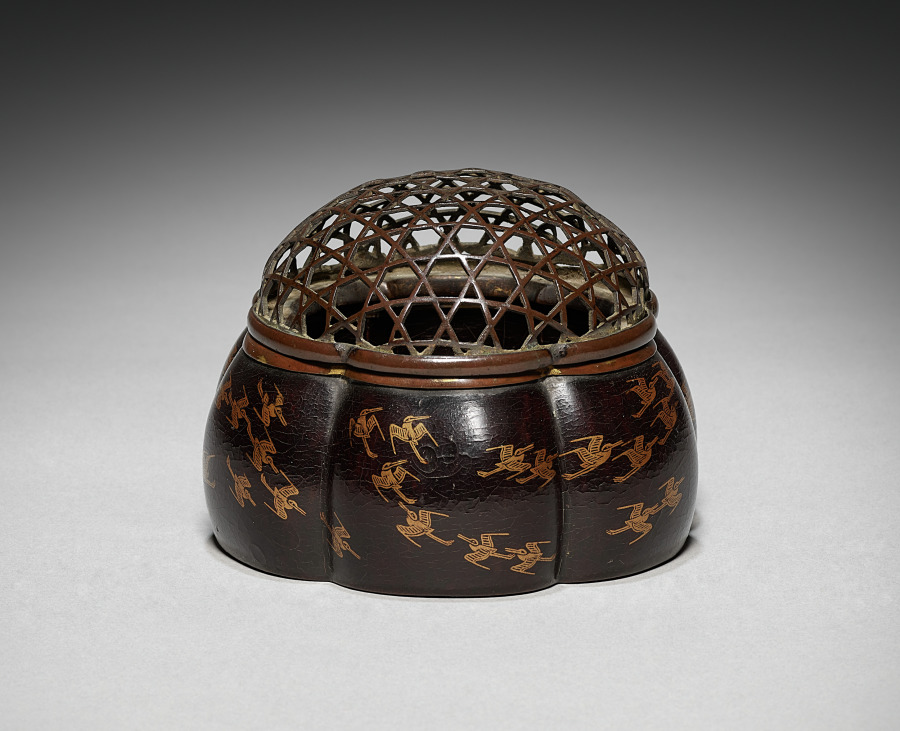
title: Incense Burner with Lid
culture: Japan, Nanbokuchō period (1336–92)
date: late 1300s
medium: black lacquer on wood with decoration in maki-e; metal rims; bronze lid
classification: Lacquer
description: This container's repeated, undulating, rounded sides evoke waves over which the articulated plovers sweep. The bronze cover (probably a later addition) mimics the design of a fishing weir. Overall, the container brings to mind the seashore. The earthy quality of the lacquered surface demonstrates the interaction between a man-made pattern (the plovers) and the somewhat unexpected surface of a natural material such as wood.